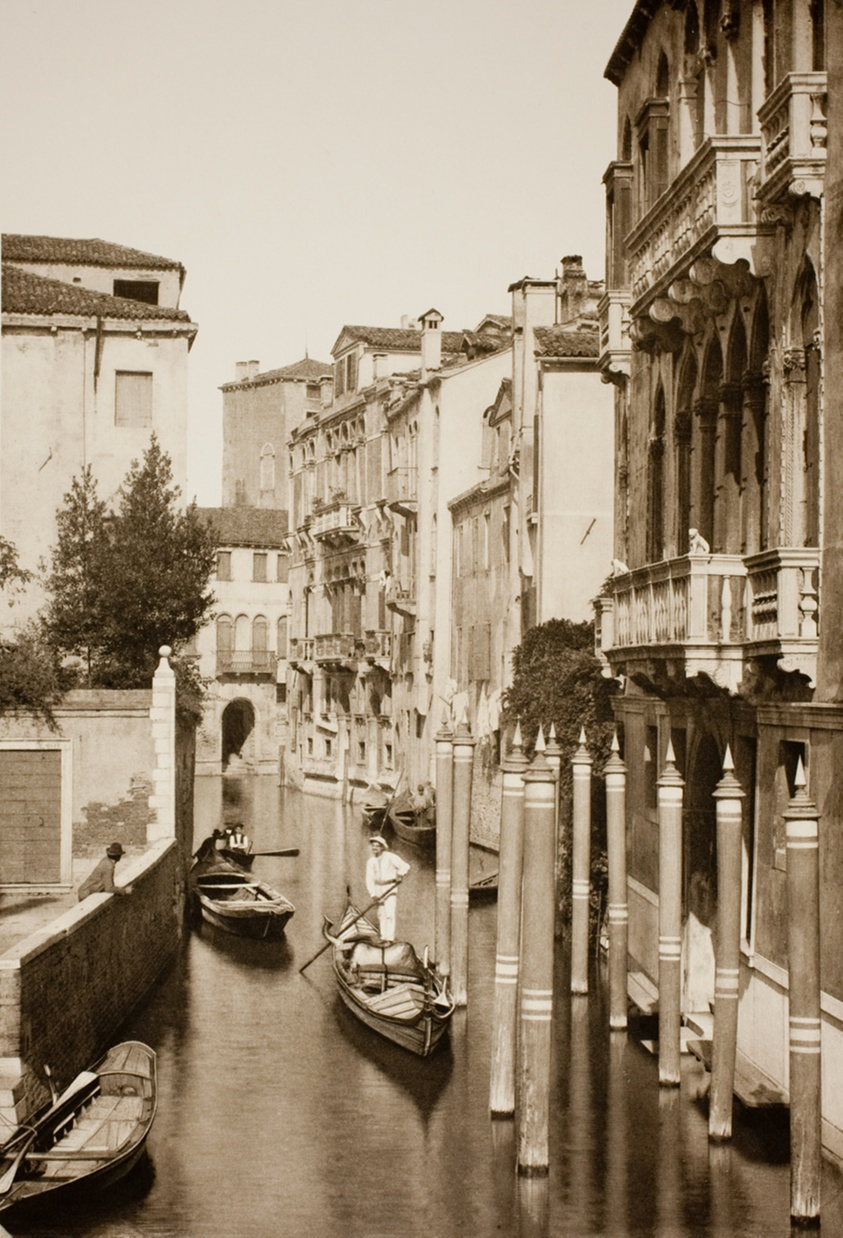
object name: Photograph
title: Untitled (II 41)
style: 19th century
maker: edited by Ferdinando Ongania; Italian, 1842–1911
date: c. 1890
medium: Photogravure, No. II 41 from the portfolio "Calli, Canali e Isole della Laguna"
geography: Italy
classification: photograph; photography